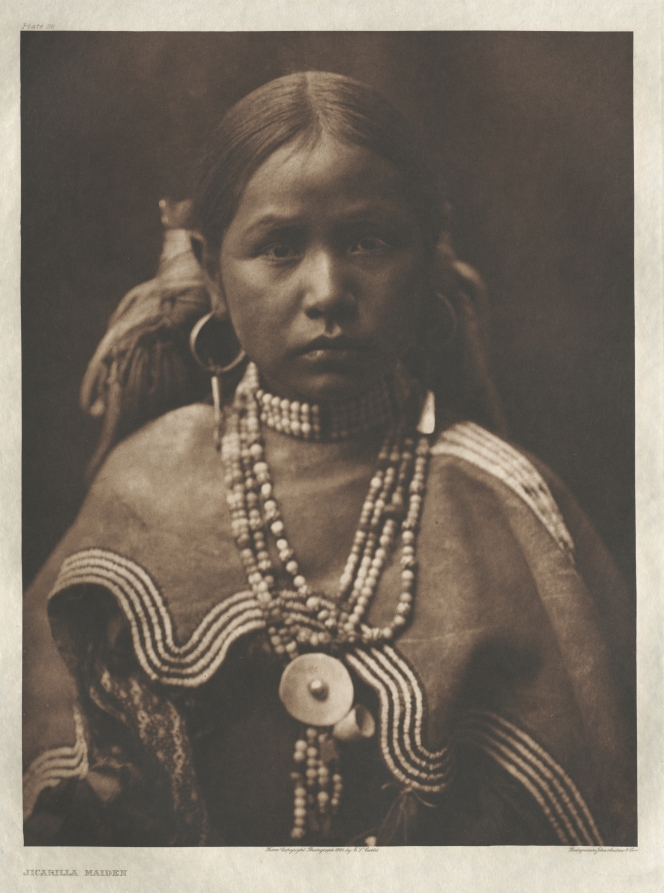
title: Portfolio I, Plate 22: Jicarilla Maiden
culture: America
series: The North American Indian: being a series of Portfolios picturing and describing the Indians of the United States, the Dominion of Canada, and Alaska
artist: Edward S. Curtis (American, 1868–1952)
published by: The University Press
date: 1904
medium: photogravure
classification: Portfolio